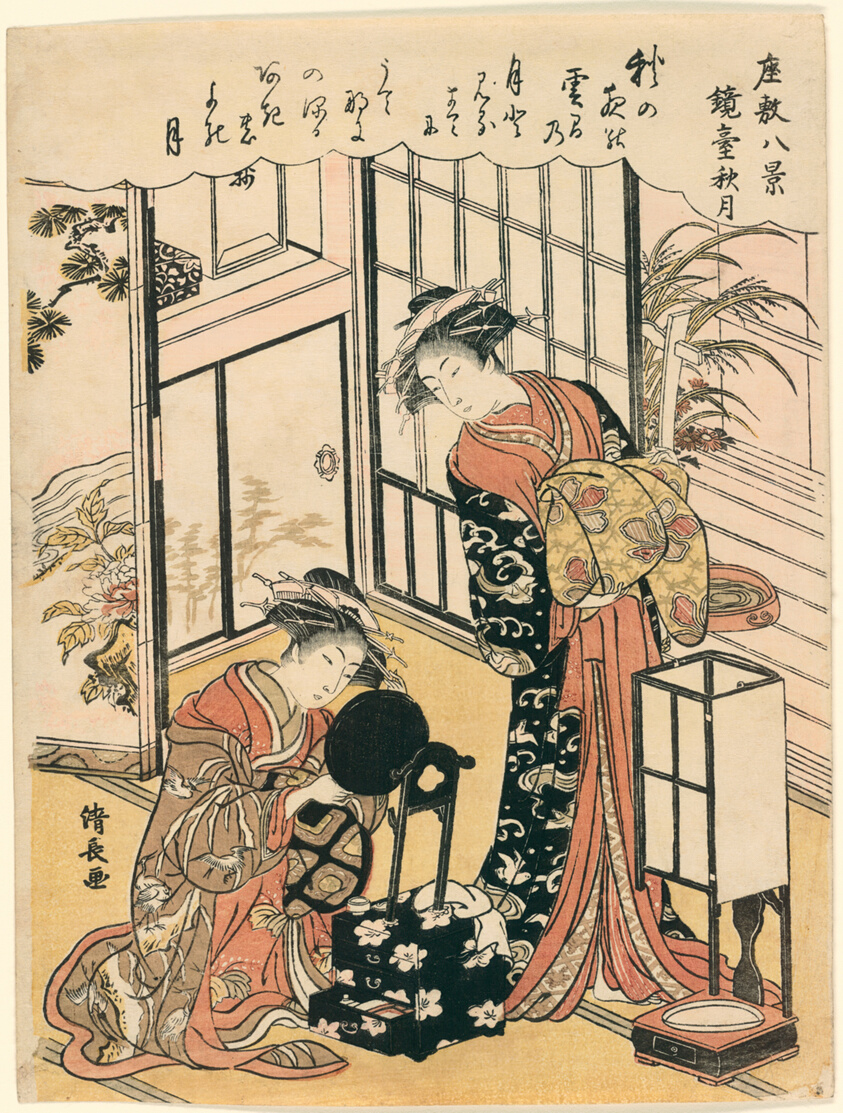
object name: Print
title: A Mirror on a Stand Suggesting the Autumnal Moon (Kyodai no shugetsu), from the series "Eight Scenes of the Parlor (Zashiki hakkei)"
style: Japanese (culture or style)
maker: Torii Kiyonaga (Japanese, 1752-1815)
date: c. 1777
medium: Color woodblock print; chuban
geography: Japan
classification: woodblock print; print; asian art